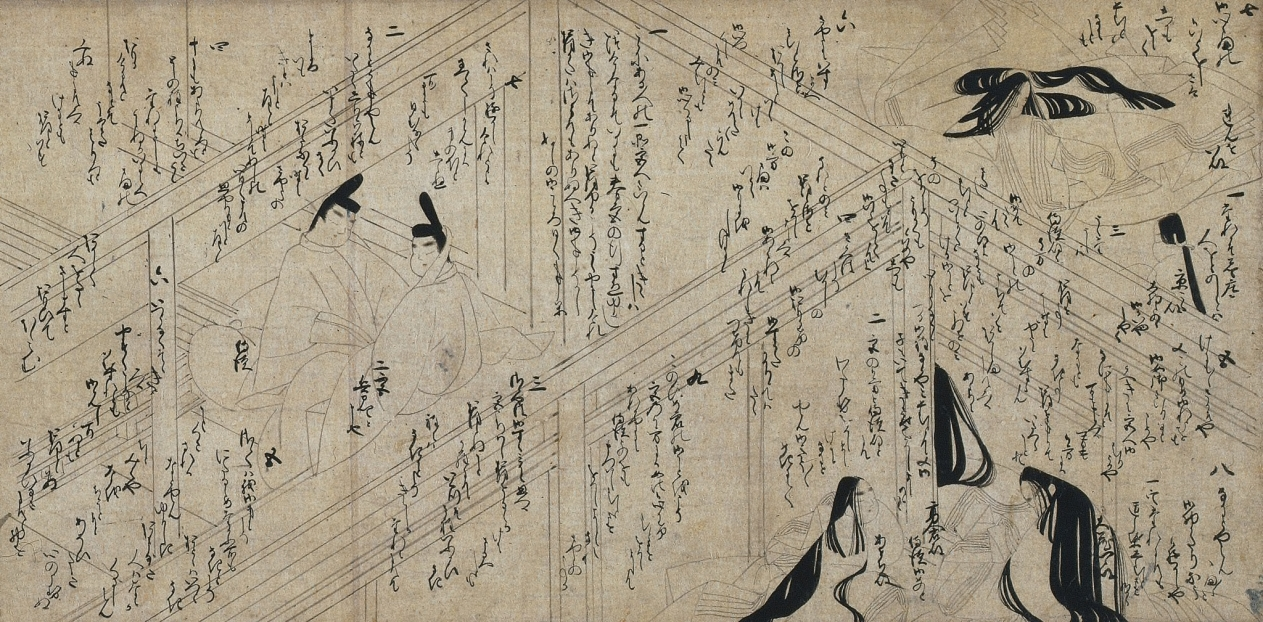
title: Scene from the Tale of the Wisteria Robe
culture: Japan, Muromachi period (1392–1573)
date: 1400s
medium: section of a handscroll mounted as a hanging scroll; ink on paper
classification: Painting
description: The Tale of the Wisteria Robe chronicles the family saga and spiritual wanderings of a noble whose garment has a signature scent. In the complete set of two scrolls, the paintings were preceded by textual passages and included dialogue floating over the characters depicted. This fragment of the story shows several figures engaged in private conversations held in chambers divided by sliding doors. Numerical notations in the text indicate the order in which things are being said.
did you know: Members of the court, both male and female, are depicted in dress and hairstyles from the earlier Heian period (794–1185).